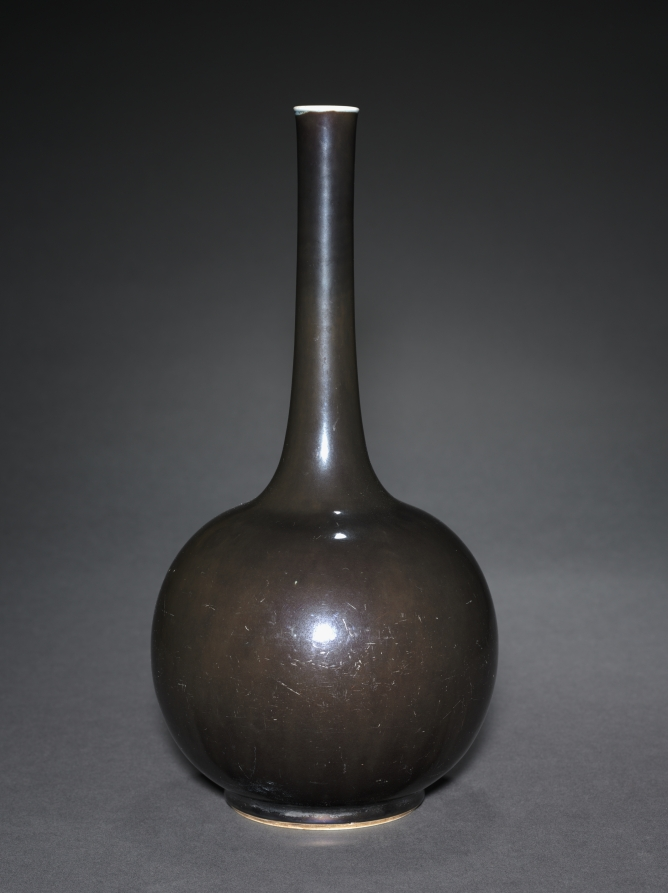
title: Globular Vase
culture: China, Qing dynasty (1644-1911)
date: 1644–1911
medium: glazed porcelain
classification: Ceramic